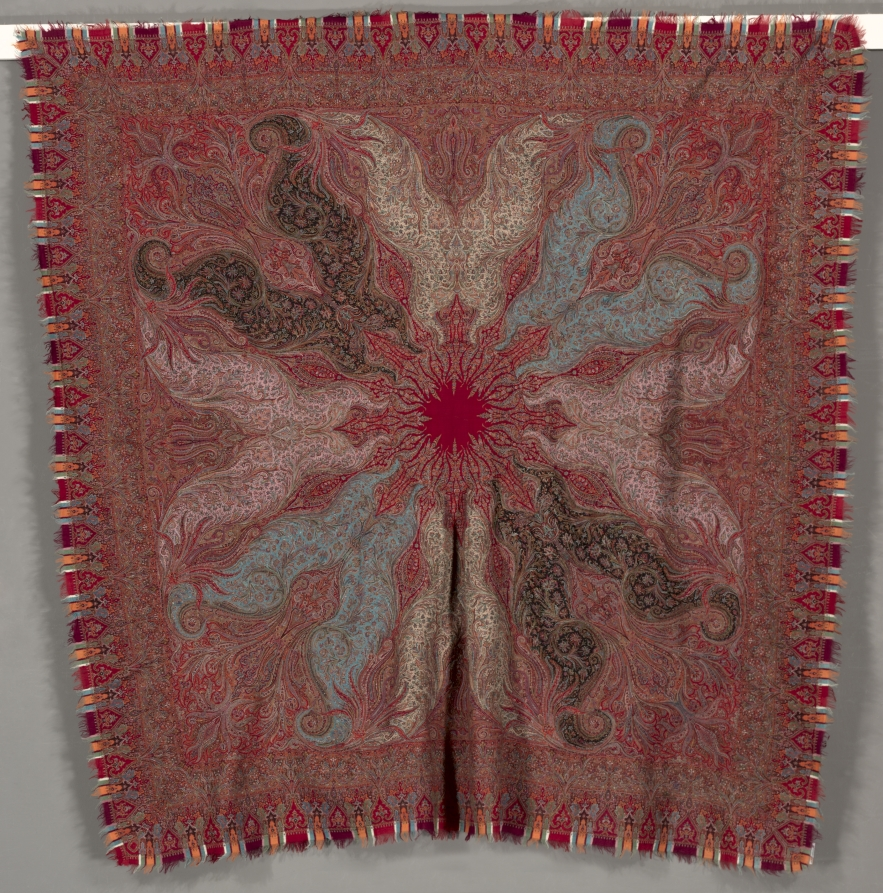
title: Square Multi-Season Pieced Shawl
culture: India, Kashmir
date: 1880s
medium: wool; 2/2 twill tapestry (S), double interlocked, pieced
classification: Textile